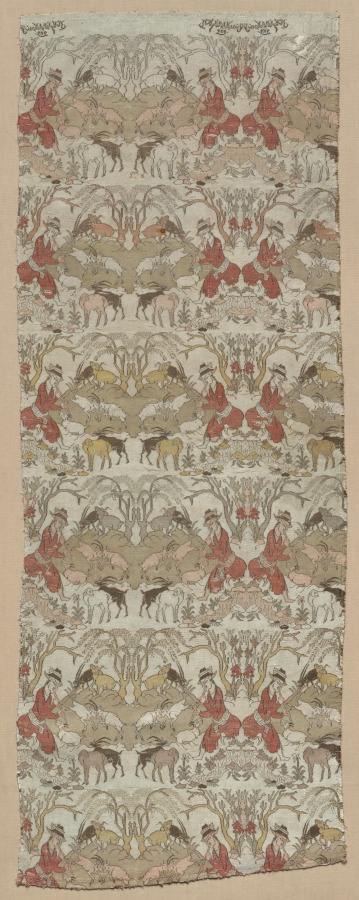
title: Silk Textile with Goatherds in a Landscape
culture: Iran, Isfahan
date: 1900s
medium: Silk: lampas weave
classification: Textile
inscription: inscription at top: "Work of the servant of the court, Abu al-Quasim Kashani, year 929."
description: This textile has a repeated design of goatherds piping to goats in a landscape setting. At the top is an inscription reading: “Work of the servant of the court, Abū al-Quāsim Kāshānī, year 929.” In the Muslim calendar 929 is equivalent to 1523, but this fabric was woven in the 1900s. This textile emulates examples from the Safavid period (1501–1722), regarded as a high point of Iranian culture. A lampas weave is characterized by the combination of two weave structures with two sets of wefts—the threads over and under which the warp threads are woven. Threads of the pattern weft are laid on top of the background weft to form the design. Lampas is typically woven in silk, sometimes with the addition of metallic thread.